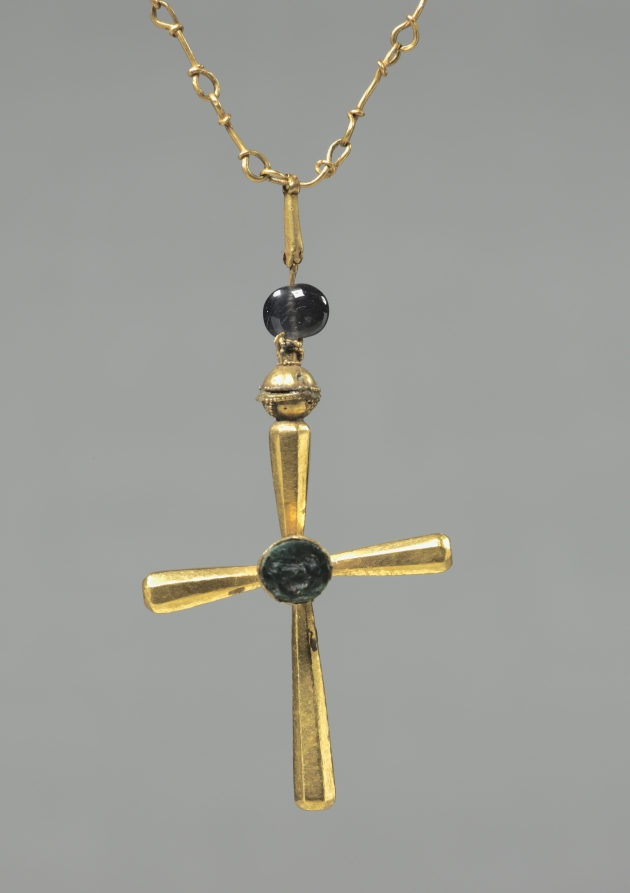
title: Chain with Pendant Cross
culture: Byzantium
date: 500s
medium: gold, sapphire, and glass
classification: Jewelry